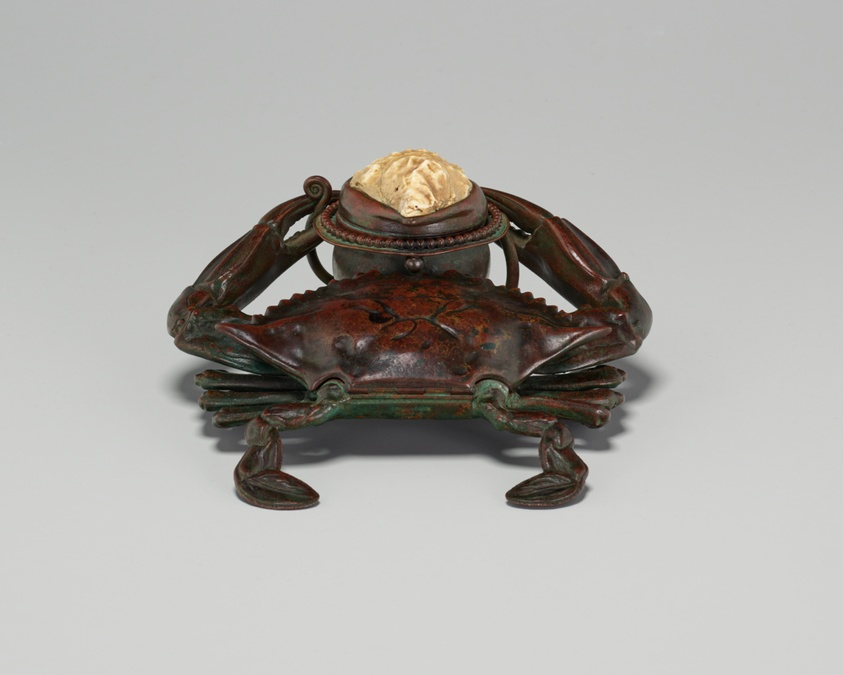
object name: Metalwork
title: “Crab” Inkstand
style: Arts and Crafts Movement, 20th Century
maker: Tiffany Studios (American, 1902–32); Corona, New York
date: c. 1905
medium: Bronze, Favrile glass, and shell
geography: Corona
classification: inkwells; inkwell liners; inkstand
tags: crabs, shells